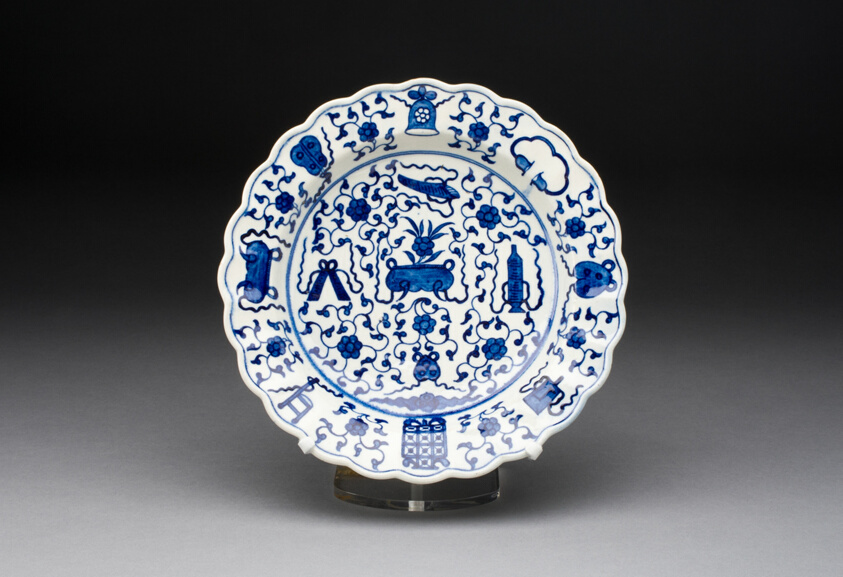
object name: Ceramics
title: Plate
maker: Worcester Porcelain Factory (Warmstry House Period, 1751–1783); Worcester, England, founded 1751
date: c. 1770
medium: Soft-paste porcelain, underglaze blue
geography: Worcester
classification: plate (general, dish); dish (vessel); porcelain; european decorative arts; ceramics